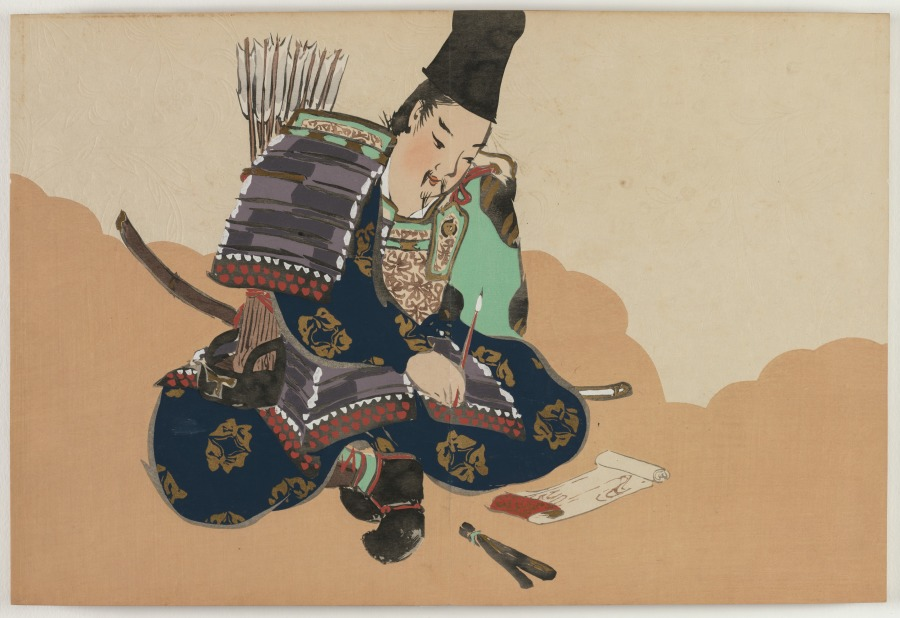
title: Flowers of a Hundred Worlds (Momoyogusa): Taira no Tadanori (Tadanori)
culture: Japan, Meiji period (1868–1912)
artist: Kamisaka Sekka (Japanese, 1866–1942)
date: 1909–10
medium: color woodcuts with gold and silver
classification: Bound Volume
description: This print from a set of three woodblock printed albums displays the graphic design prowess of Kamisaka Sekka. The images were first distributed one by one to subscribers to the series but later were reissued in bound form, like this book, for mass consumers. Each print features a vignette taken from nature or Japanese literature. Many of the scenes have a long history in Japan, originating in the 900s or 1000s and having been interpreted by all manner of artists since that time. Sekka’s selections hew closely to precedents from the Rinpa style originated by painter Tawaraya Sōtatsu (c. 1570–c. 1640) and calligrapher Hon’ami Kōetsu (1558–1637).